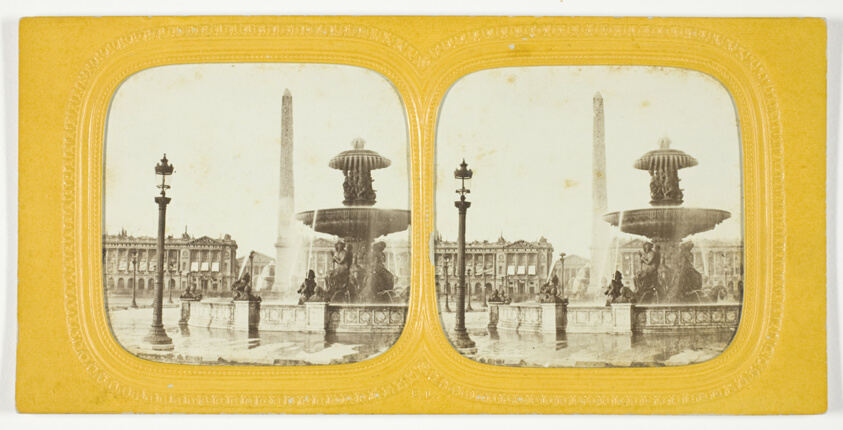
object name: Photograph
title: Place de la Concorde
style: 19th century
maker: Artist unknown; French, late 19th century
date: 1875/99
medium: Albumen print, stereo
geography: France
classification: photography; photograph